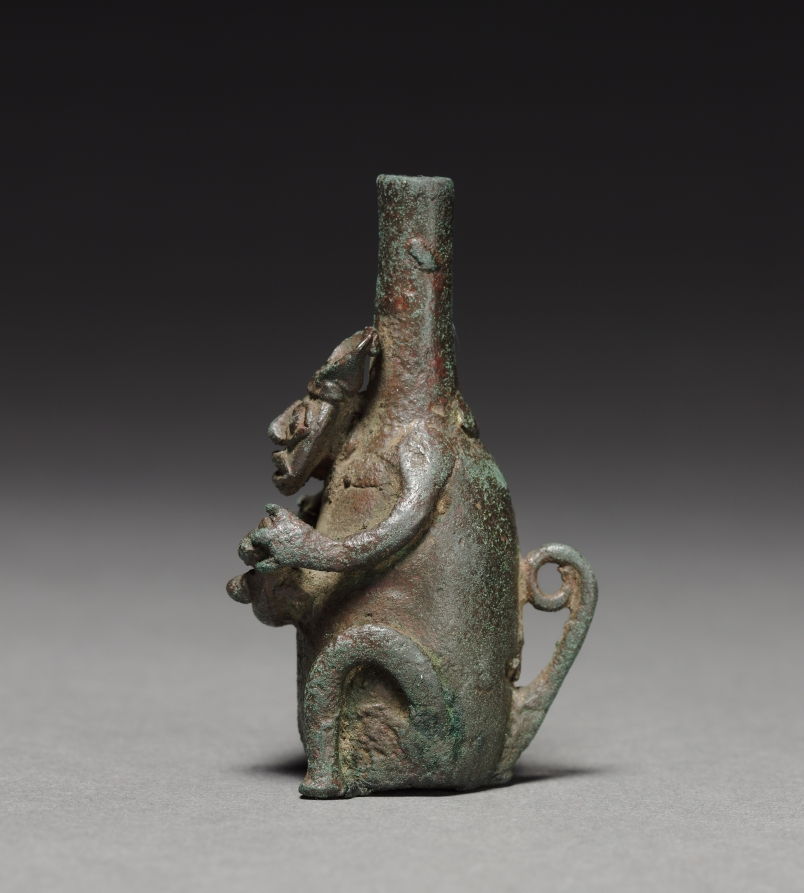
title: Feline Holding Human Figure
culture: Peru, North Coast, Moche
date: c. 100–500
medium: banded travertine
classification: Metalwork